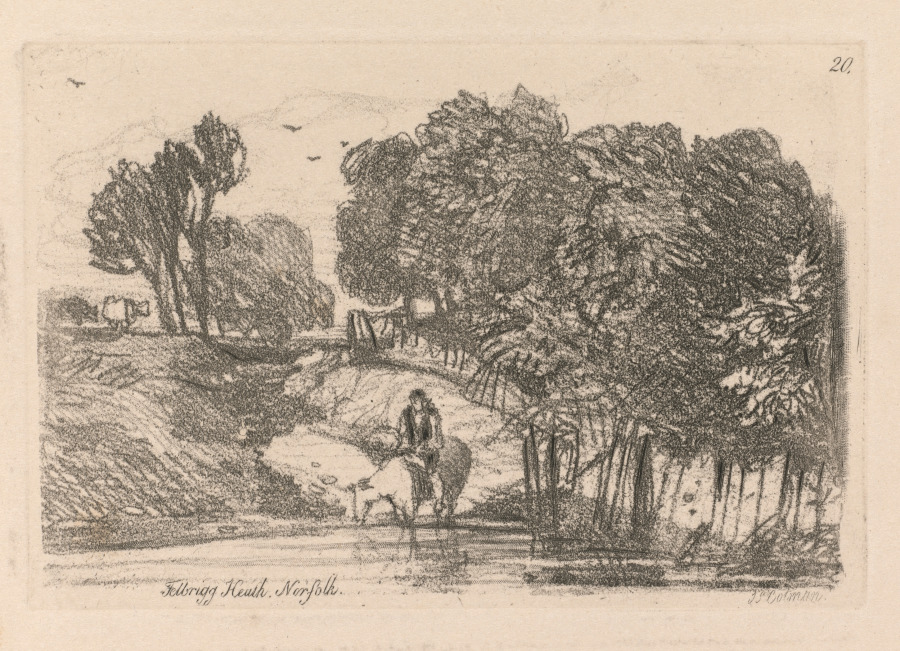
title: Liber Studiorum: Plate 20, Felbrigg Heath, Norfolk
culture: England, 19th century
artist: John Sell Cotman (British, 1782–1842)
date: 1838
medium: softground etching, from a bound volume containing 48 plates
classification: Bound Volume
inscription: In plate, within image, upper right: 20; in plate, below image: Felbrigg Heath, Norfolk; in plate, lower right, below image: J S Cotman